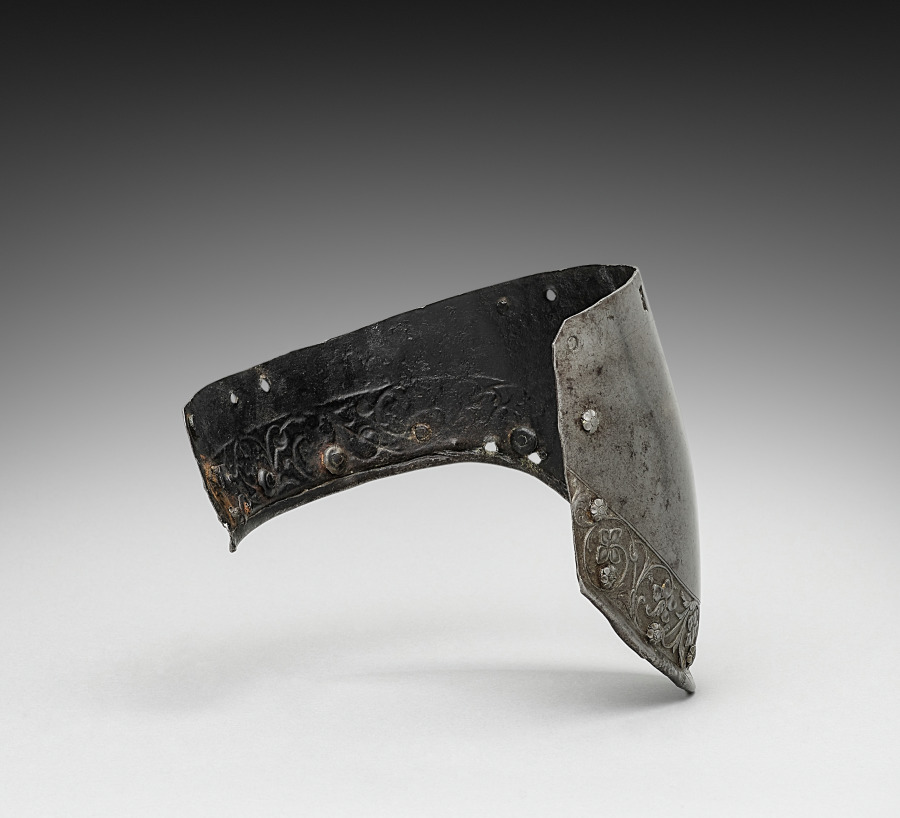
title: Upper Arm Canon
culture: Itlay, Milanese style of 16th century, probably 19th century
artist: attributed to Negroli Workshop (Italian, c. 1500–1561)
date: 1800s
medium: steel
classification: Arms and Armor